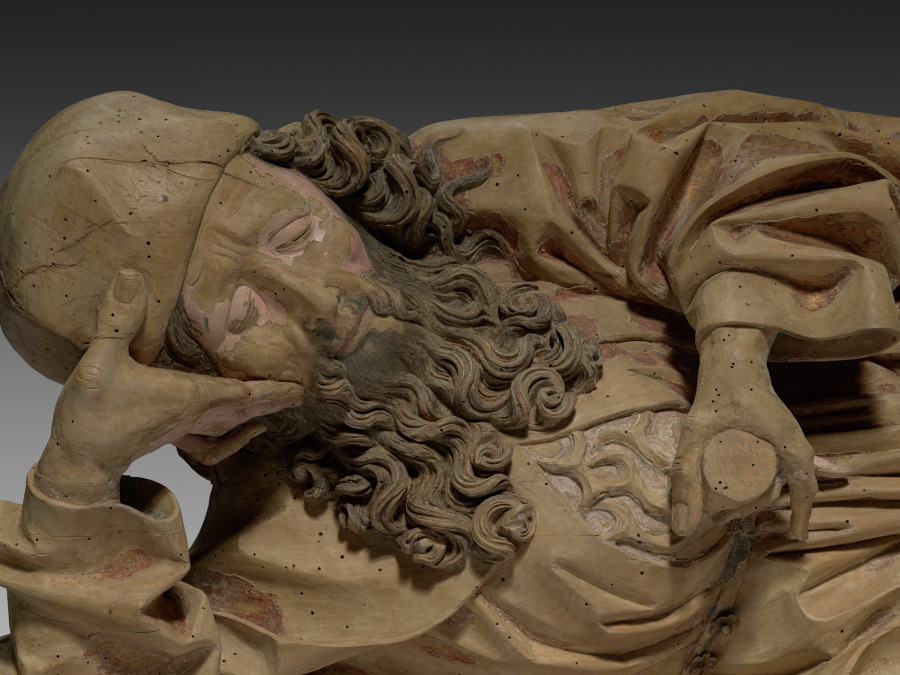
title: Jesse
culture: Germany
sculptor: Veit Stoss (German, c. 1445–1533)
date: c. 1500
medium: Limewood, polychromed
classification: Sculpture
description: The figure shows the sleeping Jesse, the father of David from the Old Testament. As the ancestor of the family tree of Christ, he was depicted in the Middle Ages sleeping as the starting point of the tree, on whose branches the ancestors of Christ are depicted. Mary with the Christ child is always shown at the top. The figure comes from a wooden altarpiece from an unknown church, possibly in Nuremberg, which is now lost. Veit Stoss is one of the most prominent German sculptors around 1500 who was mainly active in Nuremberg (Bavaria, Germany) and Krakow (Poland), also as a painter and engraver.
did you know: The family tree of Christ starts from Jesse, the father of David in the Old Testament.